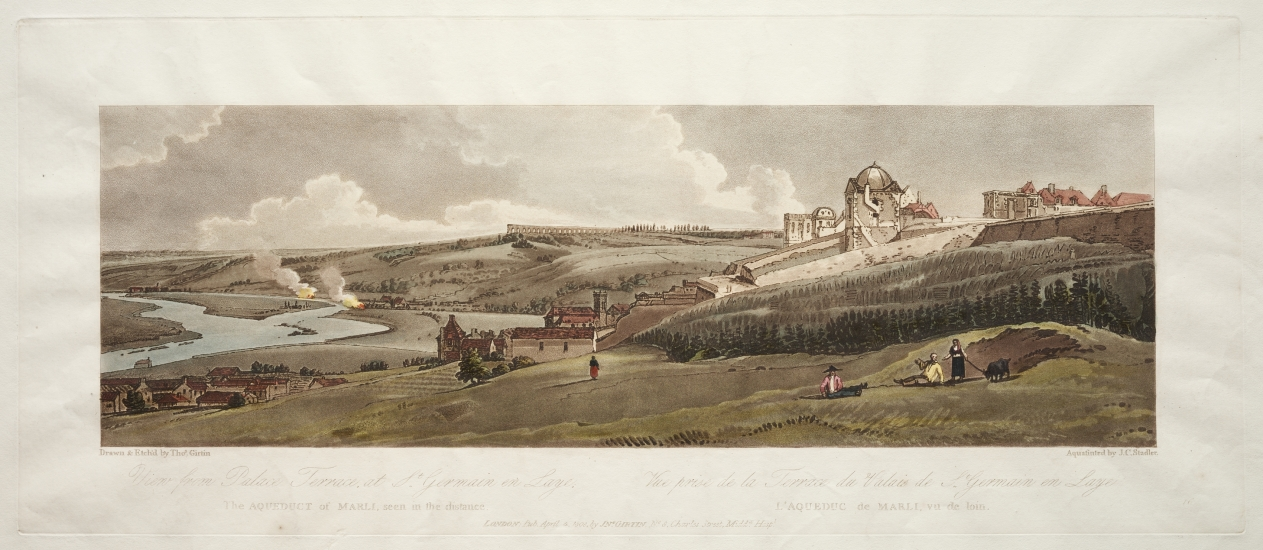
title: A Selection of Twenty of the Most Picturesque Views in Paris: View from Palace Terrace, at St. Germain en Laye, the Aquaduct of Marli seen in the Distance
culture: England, 19th century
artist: Thomas Girtin (British, 1775–1802)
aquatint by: Joseph Constantine Stadler (German, active 1780–1822)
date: 1803, printed 1810 or after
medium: softground etching and aquatint printed in brown, hand-colored with watercolor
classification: Print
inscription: In plate, lower right: 16; In plate: Drawn & Etch'd by Thos Girtin; Aquatinted by J. C. Stadler; LONDON: Pub April 4 1803 by JNoGIRTIN, No. 8, Charles Street, Middlesex Hospital